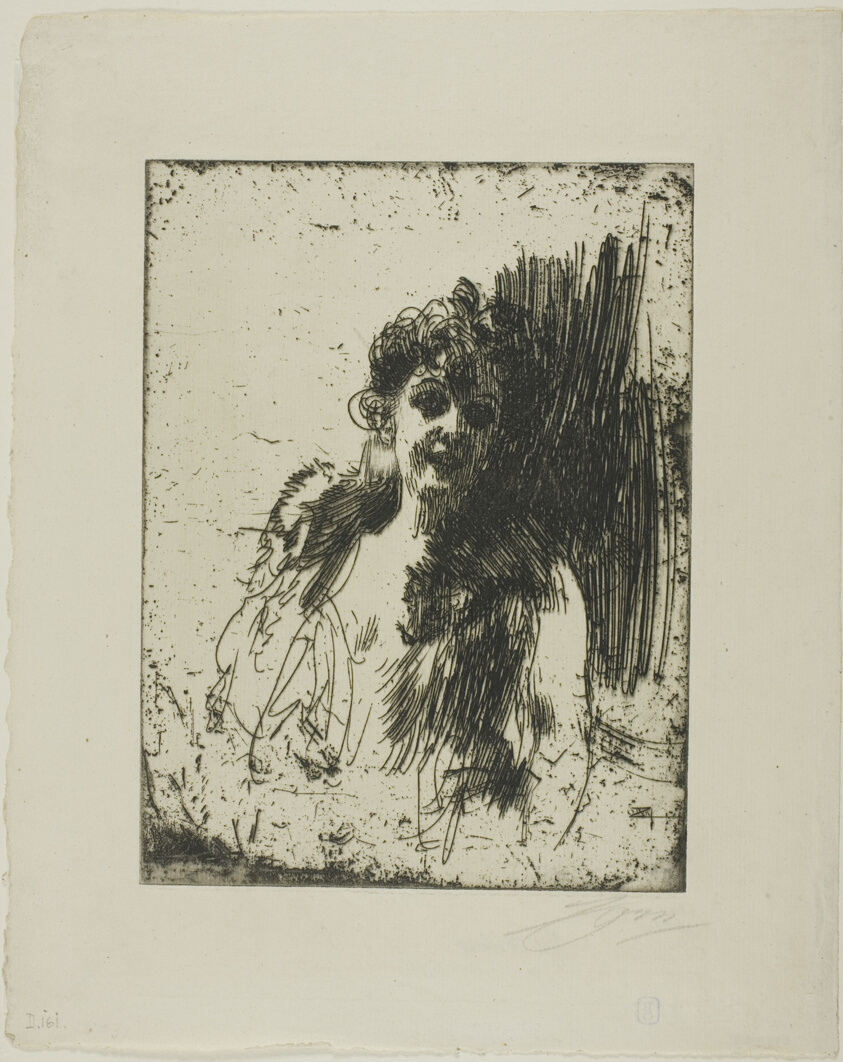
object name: Print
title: Mrs. Cotton II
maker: Anders Zorn (Swedish, 1860-1920)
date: 1901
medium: Etching on ivory laid paper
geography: Sweden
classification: etching; print; prints and drawing